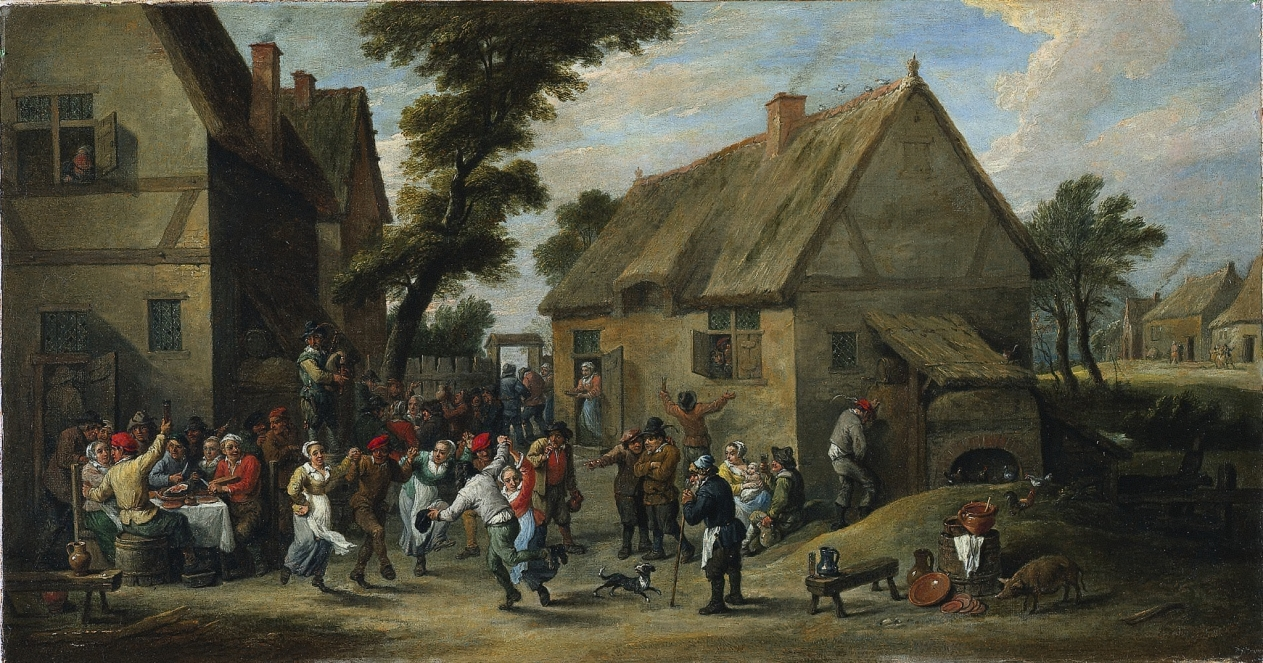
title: Village Festival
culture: Flanders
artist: David Teniers (Flemish, 1610–1690)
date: c. 1646–50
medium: oil on canvas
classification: Painting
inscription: Signed lower right: "D. TENIERS. FEC."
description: Depictions of peasant festivals, such as weddings, harvests, and village holidays became an extremely popular subject for Flemish artists during the 1600s. In his paintings of these festive occasions David Teniers the Younger (1610–1690), portrayed peasants dancing and playing music, focusing on the cheerful elements of peasant life. His images often feature close-knit family groups taking part in the celebration. Contrary to his predecessors, who often depicted broken and disorderly still life objects in their paintings, Teniers emphasized household objects in brass, ceramic, and glass in a perfect state to demonstrate the growing prosperity of the peasants.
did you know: Surviving drawings show that Teniers sketched many peasants from life, and similar figures appear throughout his peasant paintings from about 1640 to 1660.